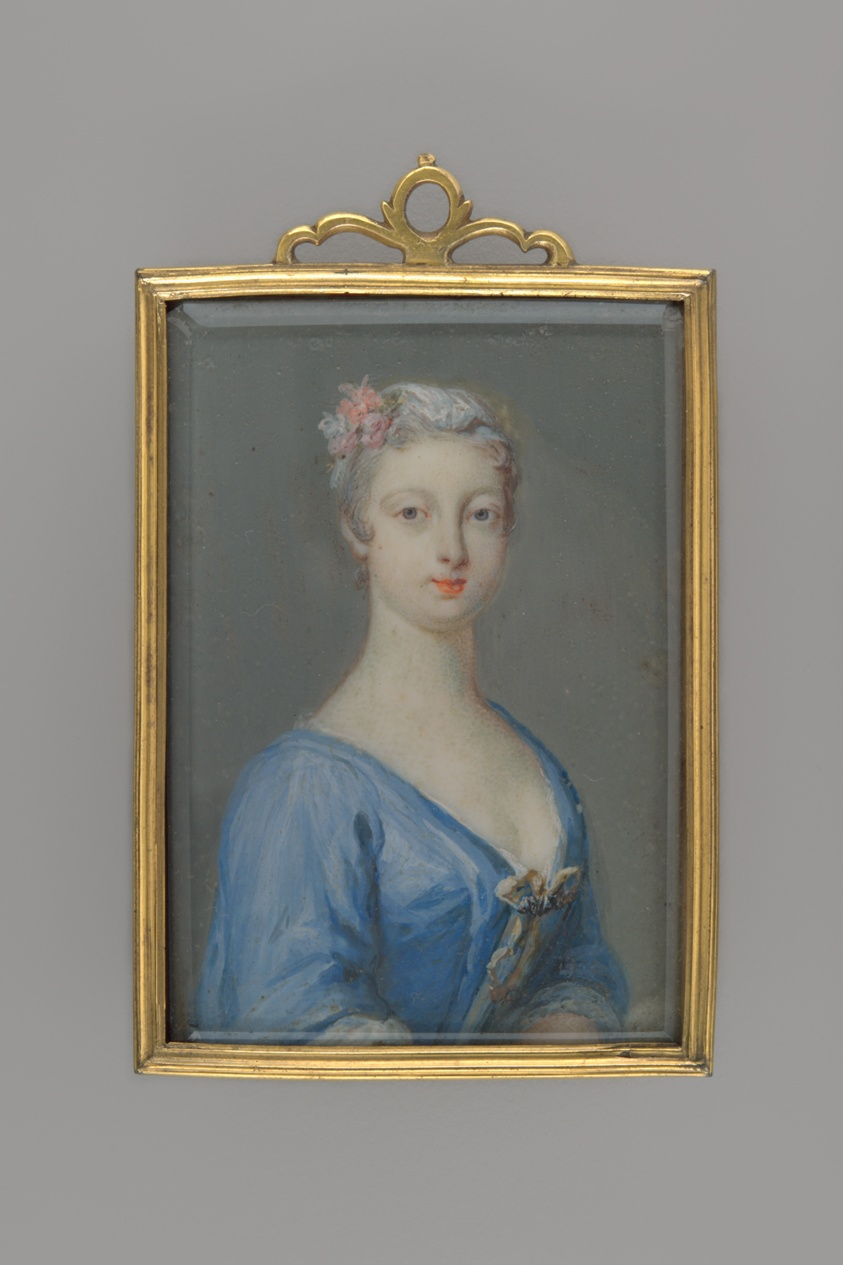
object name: Miniature Painting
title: Portrait of Countess Grafin von Furstenberg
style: 18th Century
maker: Attributed to Rosalba Carriera (Italian, 1673-1757)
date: c. 1740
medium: Watercolor on ivory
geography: Italy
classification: miniature painting; european decorative arts; european painting; miniature; portrait; portrait; Italian; ivory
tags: portrait, portraits, lace, flowers, wealth, dresses, blue (color), blue, pink (color), nobility, woman, portraits: female subject